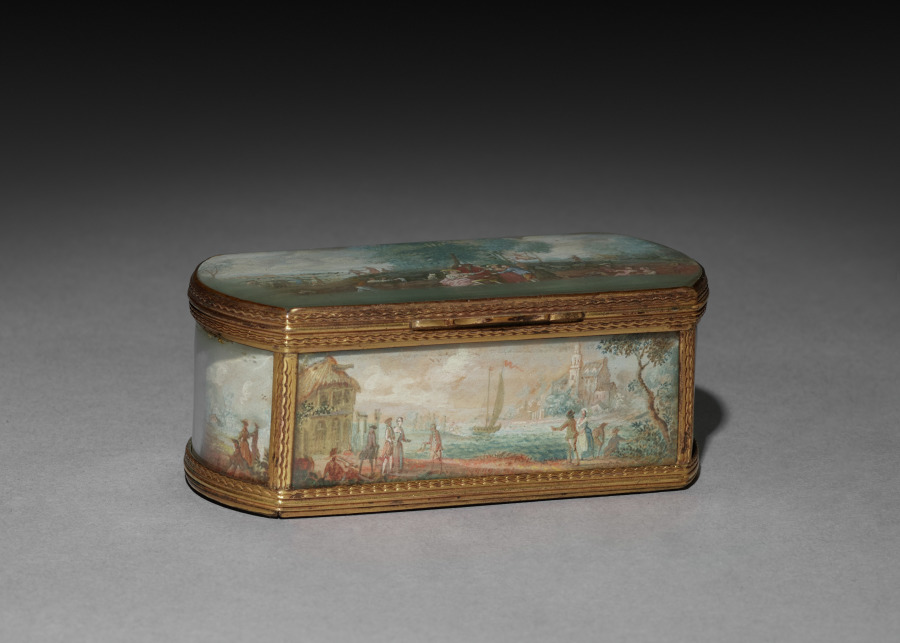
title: Snuff Box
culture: France, 19th century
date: 1800s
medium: gilt metal box with painted miniatures under glass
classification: Miscellaneous